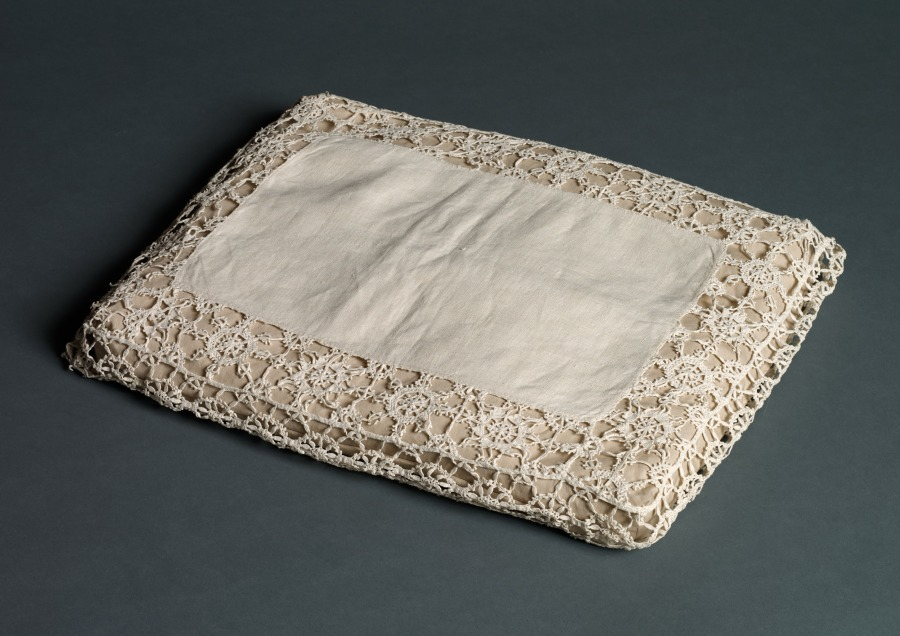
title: Lace Pillow Cover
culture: Italy, Genoa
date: 1600s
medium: Linen: needle lace (reticella) and bobbin lace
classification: Lace